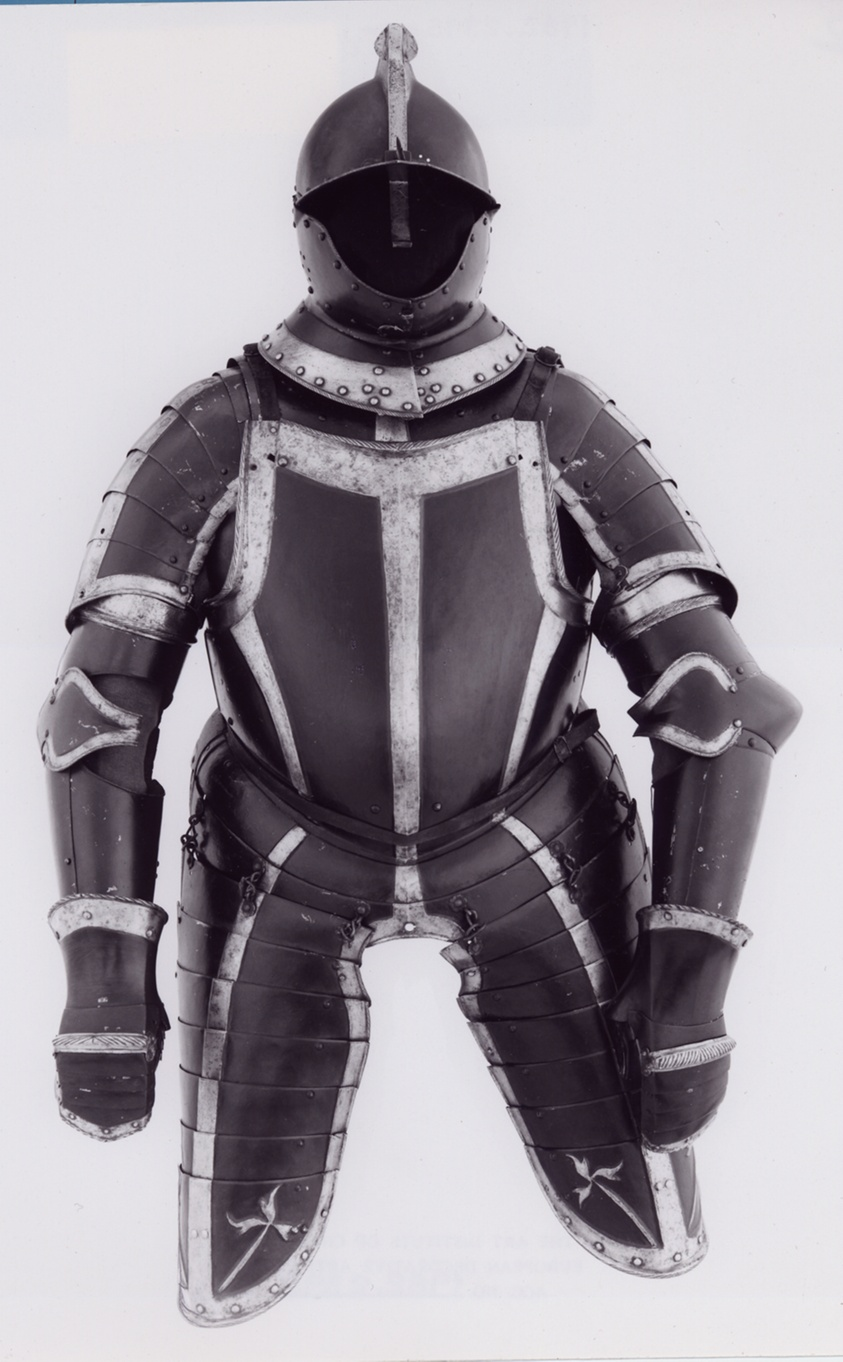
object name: Armor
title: Infantry Armor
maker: North German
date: c. 1550-60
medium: Steel, iron, leather and black paint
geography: Germany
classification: suit; armor; arms and armor